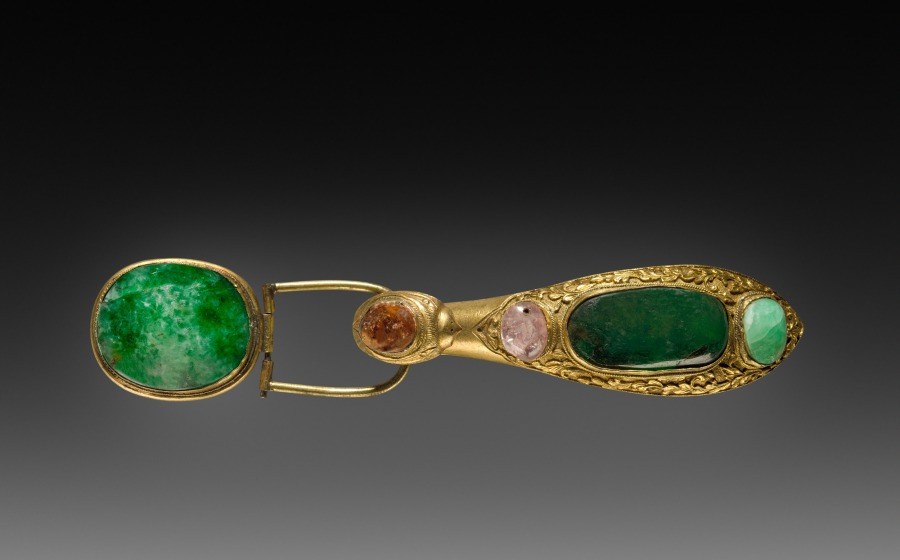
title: Buckle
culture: China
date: 1900s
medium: gilt brass, engraved and set with jade and quartz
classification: Jewelry